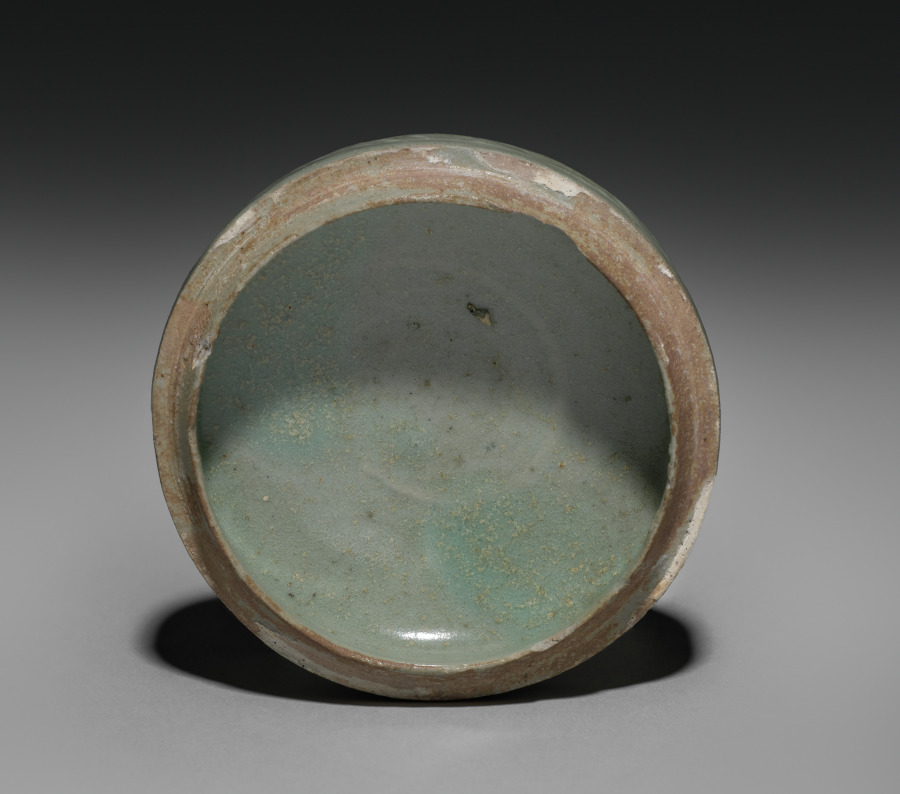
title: Box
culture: Korea, Goryeo dynasty (918–1392)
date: 918–1392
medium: earthenware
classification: Ceramic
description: Celadons, spoons, seals, and bronze mirrors were the most common burial objects in tombs during the Goryeo period (918–1392). Once used to contain colored powder, rouge, and eyebrow gel for makeup, this small container was one of the standard goods that furnished elites' tombs. Both women and men used the grain powder of rice or millet for whitening their skin, safflower extract for rouge, and plant ash or soot for eyebrow gel. Yet, natural-looking makeup seems to have been the most favorable one in Korea according to the travelogue by Xu Jing (1091–1153), the Chinese diplomat who visited Korea in 1123.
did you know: This lidded ceramic container was used to store either incense or cosmetics.